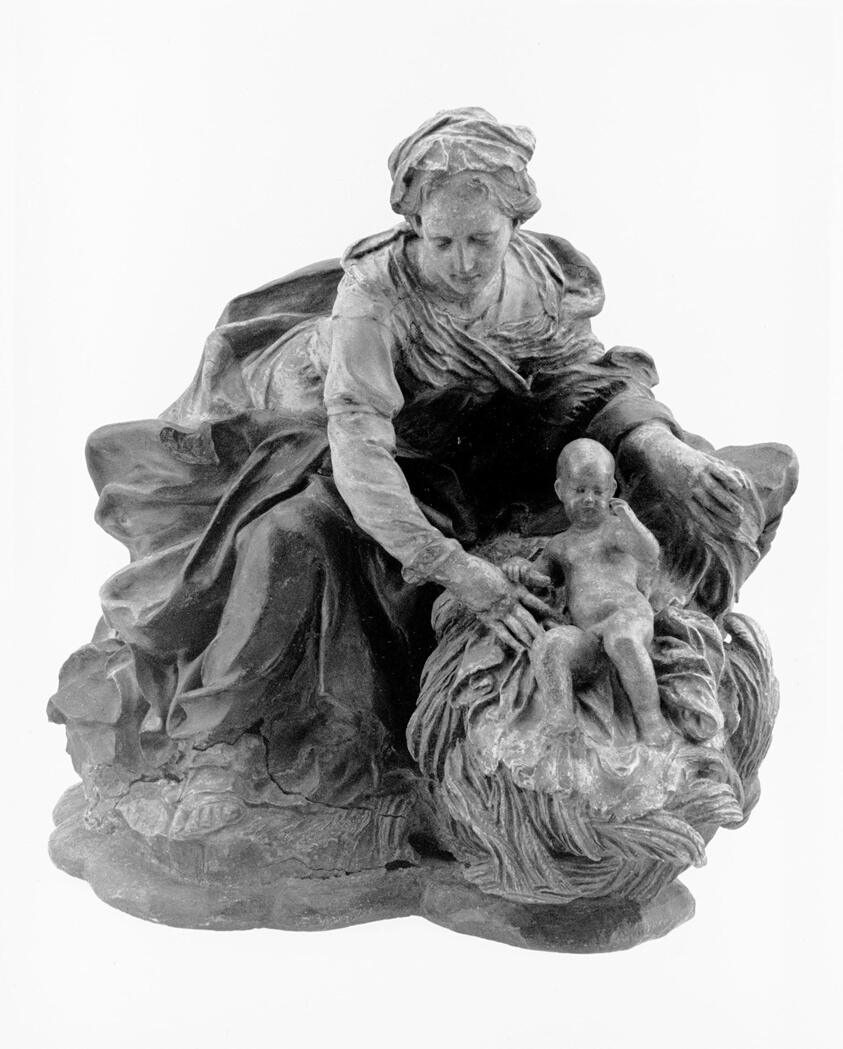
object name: Sculpture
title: The Holy Family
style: 17th Century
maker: Giovanni Giuseppe Mazza (Italian, 1653–1741)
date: c. 1690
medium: Painted terracotta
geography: Italy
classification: statuette; sculpture; Italian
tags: Virgin and child/Madonna and child, babies, children, Christian subjects, Christianity, figures, holy family, Jesus, Madonna, mother, mother and child, religion, religious, religious figures, sons, Virgin Mary, woman